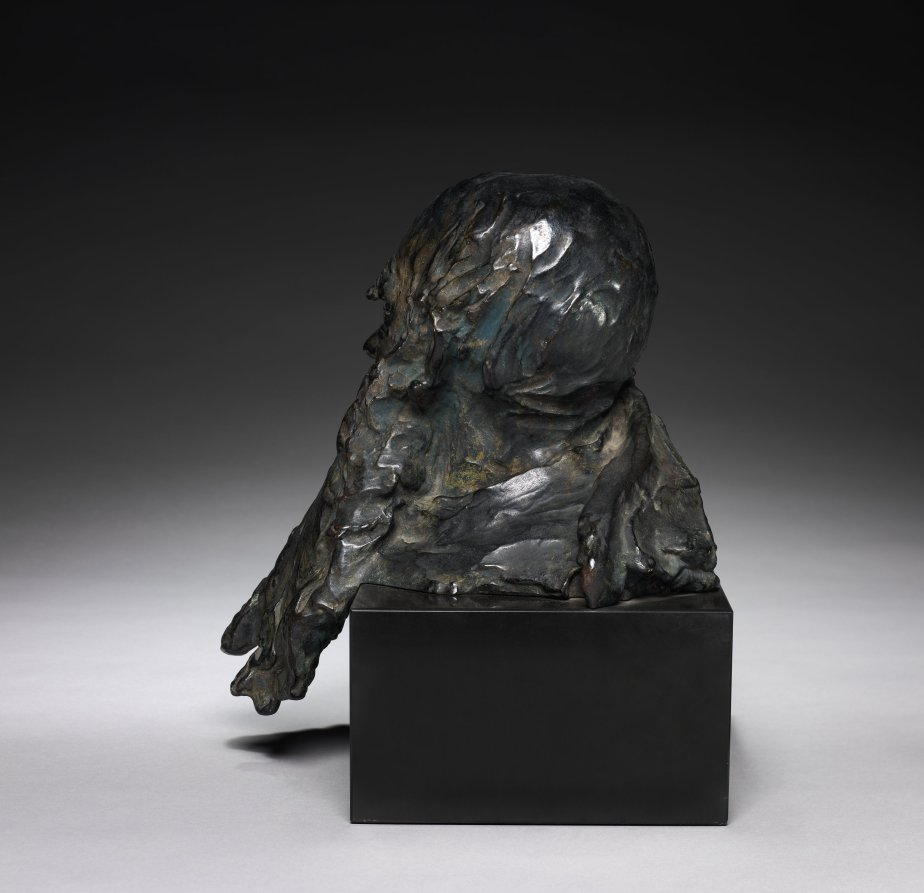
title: Bust of Tolstoy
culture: France, late 19th-early 20th century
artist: Théodore Rivière (French, 1857–1912)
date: d. 1985 – 1905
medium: bronze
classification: Sculpture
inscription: Signed on back of shoulder to left: "Theodore Riviere"